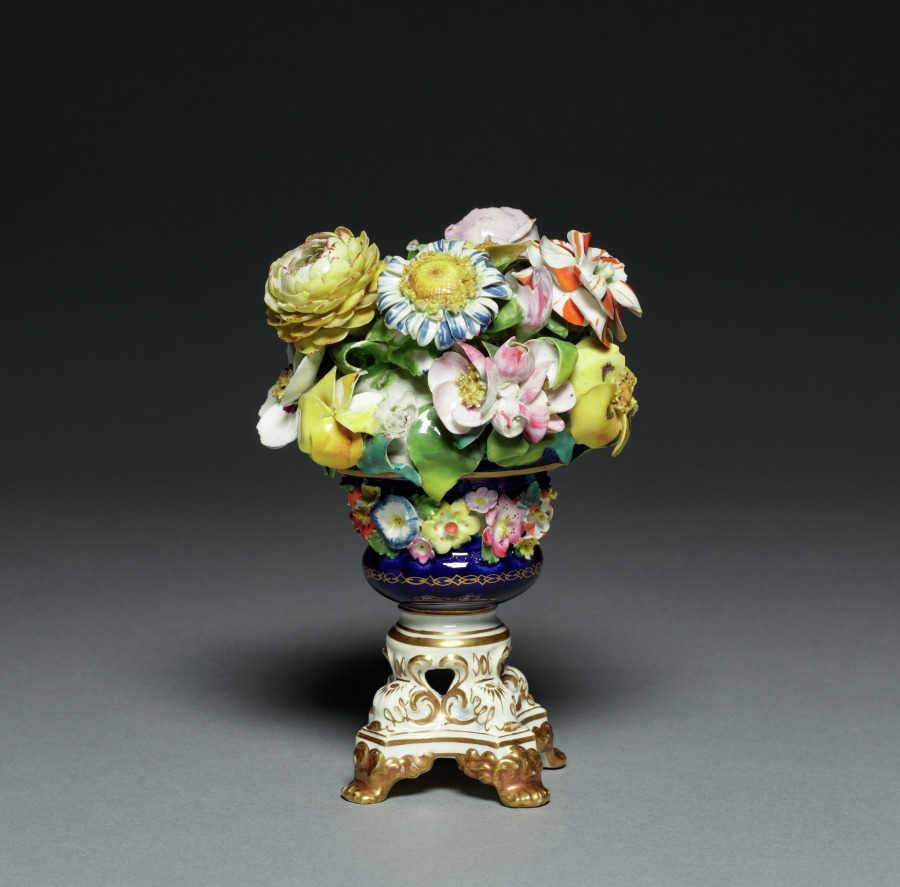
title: Flower Pot and Flowers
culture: England, Derby, 19th century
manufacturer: Derby Porcelain Factory (Bloor Period) (British)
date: 1811–1848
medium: artificial porcelain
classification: Ceramic